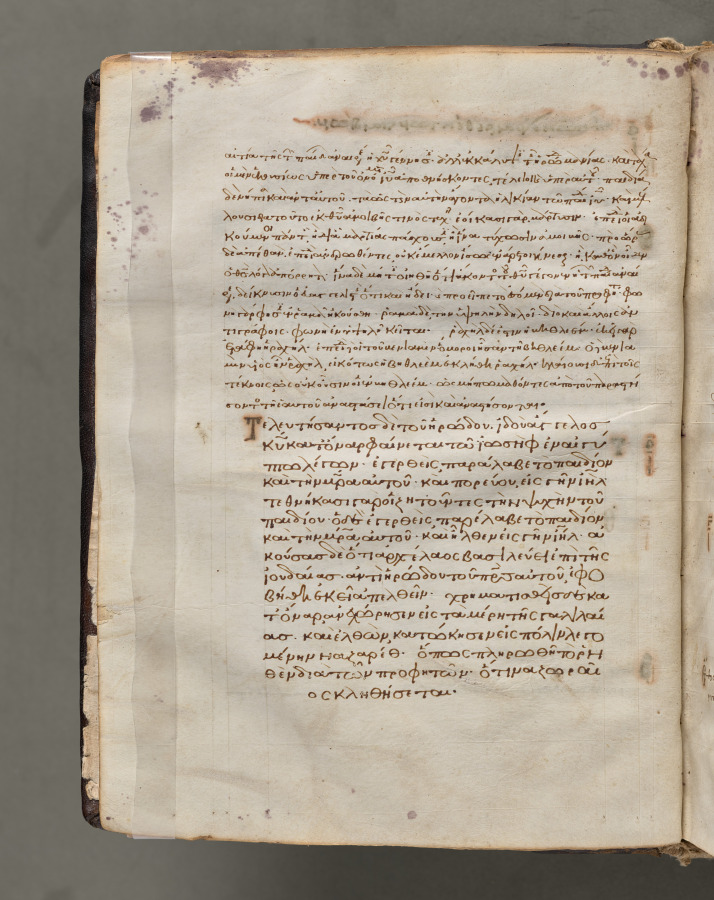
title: Text, folio 11 (verso), from a Gospel Book with Commentaries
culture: Byzantium, Constantinople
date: c. 1000–1100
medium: ink, tempera, and gold on vellum; leather binding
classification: Bound Volume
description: Each of the four gospels in this book opens on a page with brilliantly illuminated borders depicting the author of the text as well as birds-principally peacocks, symbols of the immortality of the soul-and fountains, representing the fountain of life and the salvation of the soul. This volume consists of 428 leaves with texts in Greek. Its level of sophistication suggests that it was probably written and decorated in a monastery in Constantinople.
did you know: Gospel Books were carried in procession through Byzantine churches.